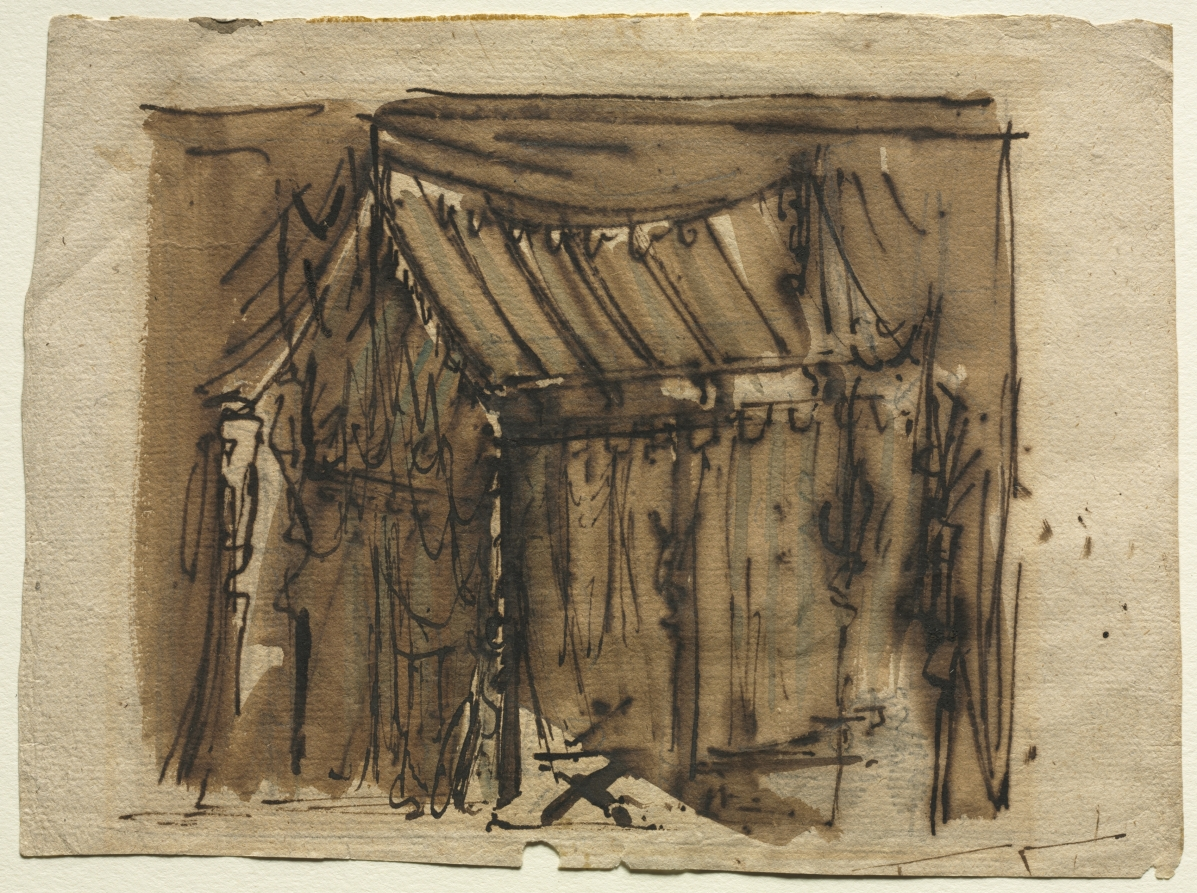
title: Tent (recto)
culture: Austria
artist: Josef Platzer (Austrian, 1751–1806)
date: late 1800s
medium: drawing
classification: Drawing